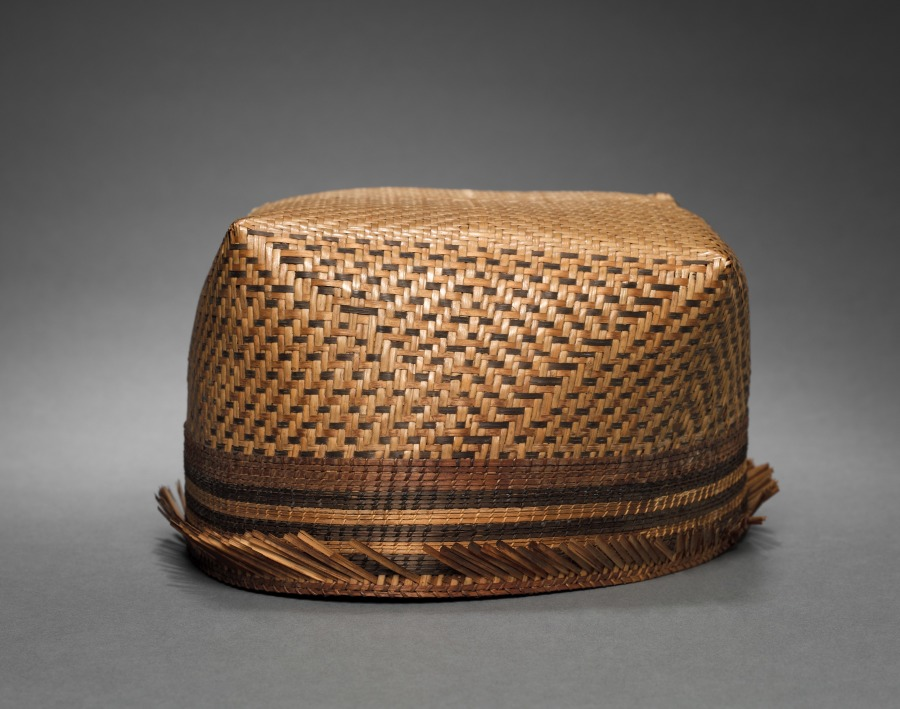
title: Hat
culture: Africa, Central Africa, Democratic Republic of the Congo, Mangbetu, 20th century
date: before 1929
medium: Plant fibers and dye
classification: Garment